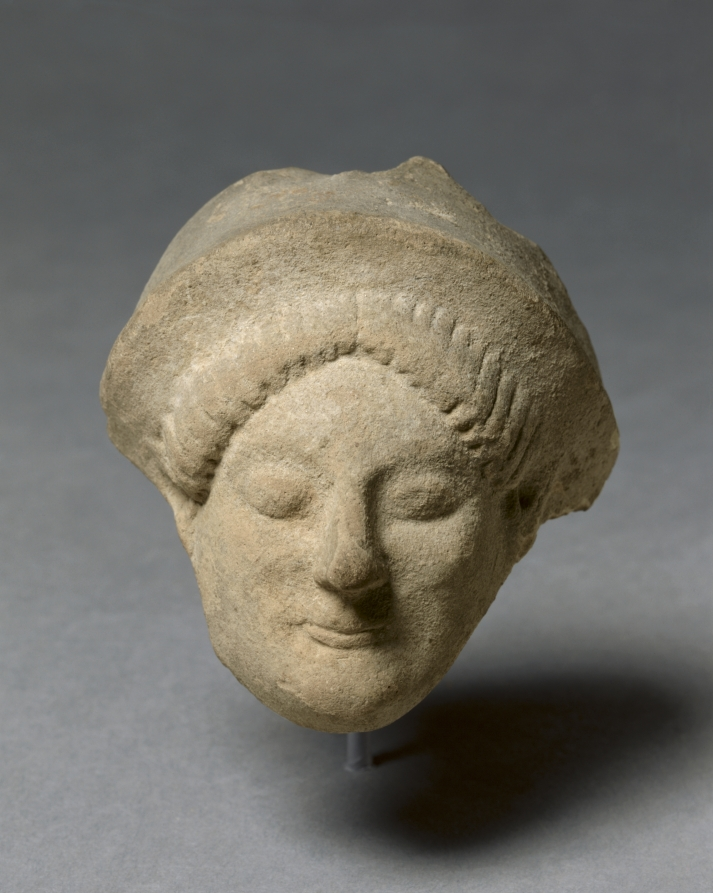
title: Archaic Mask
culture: Greek, Sicily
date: 500s BCE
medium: terracotta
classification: Sculpture